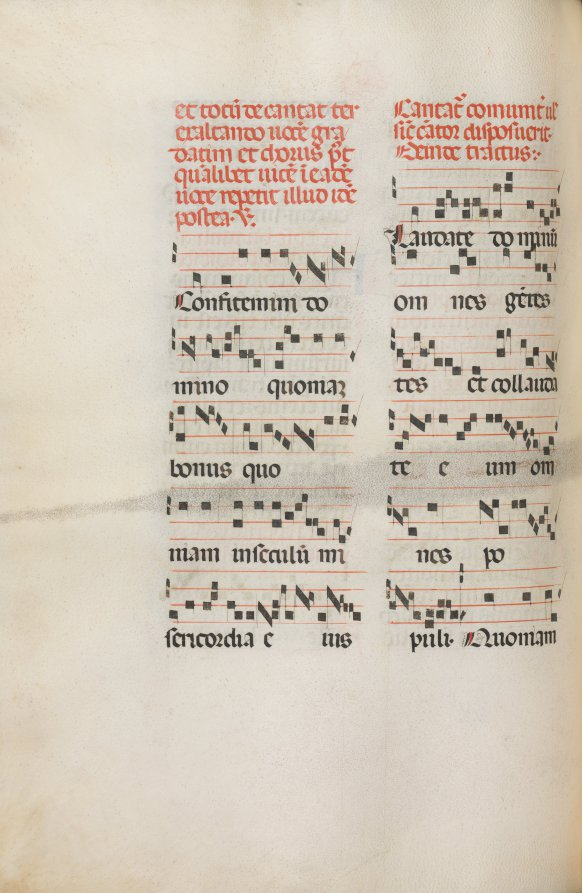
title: Missale: Fol. 171v: Music for "Alleluia" etc. at beginning of Easter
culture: Italy, Perugia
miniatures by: Bartolommeo Caporali (Italian, c. 1420–1503)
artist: assisted by Giapeco Caporali (Italian, d. 1478)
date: 1469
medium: ink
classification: Bound Volume